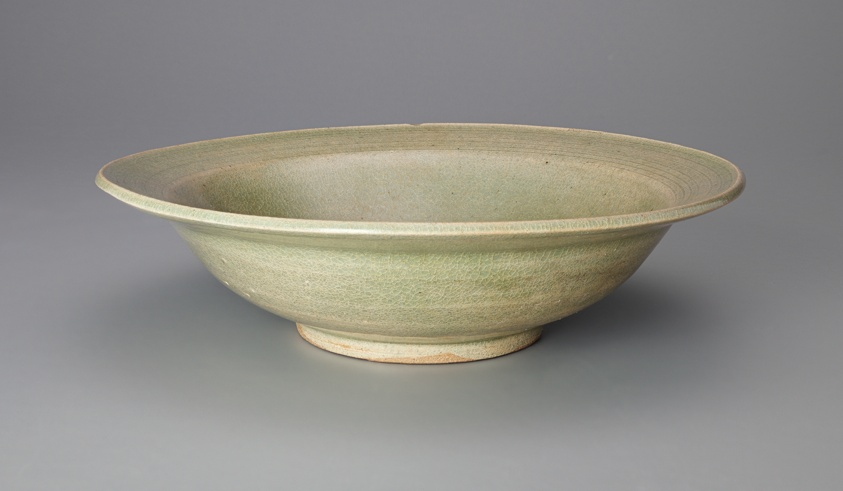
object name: Decorative Arts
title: Dish with Incised Rings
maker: Thailand, Chiang Rai Province, Muang Phan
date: 14th century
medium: Stoneware with celadon glaze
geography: Northern region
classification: stoneware; decorative arts